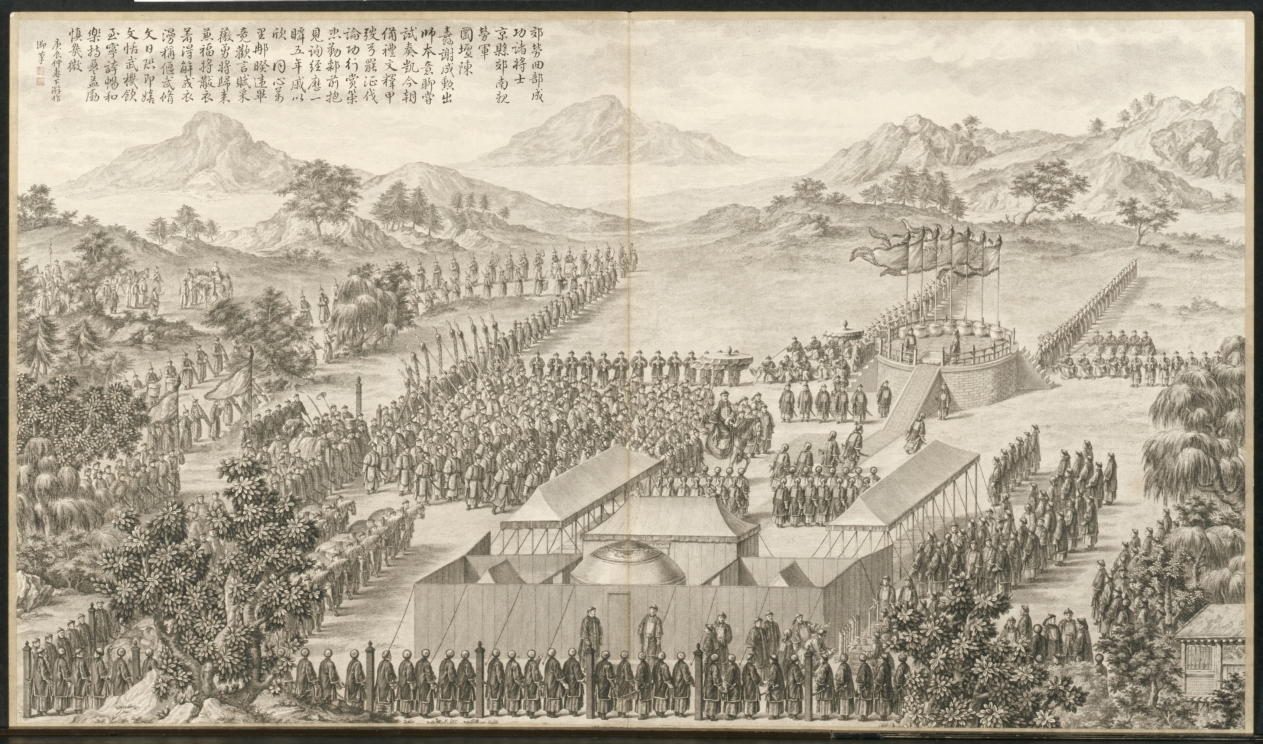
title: Rewards to Generals and Officers in Quelling the Uigurs: from Battle Scenes of the Quelling of Rebellions in the Western Regions, with Imperial Poems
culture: China, Qing dynasty (1644–1911), Qianlong period (1736–95)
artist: Jean Damascene Sallusti (Italian, d. 1781)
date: c. 1765–74; poem dated 1760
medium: etching, mounted in album form, 16 leaves plus two additional leaves of inscriptions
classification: Print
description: This set of etchings was commissioned by Emperor Qianlong to record in pictorial terms the courage of his generals and soldiers in quelling the rebellions in the Western Regions. Qianlong added his own poem to each of the etchings, indicating his appreciation and pride in this demonstration of military might. "Western Regions" refers to the present-day Xingjiang province, often described in Western writing as "Central Asia."